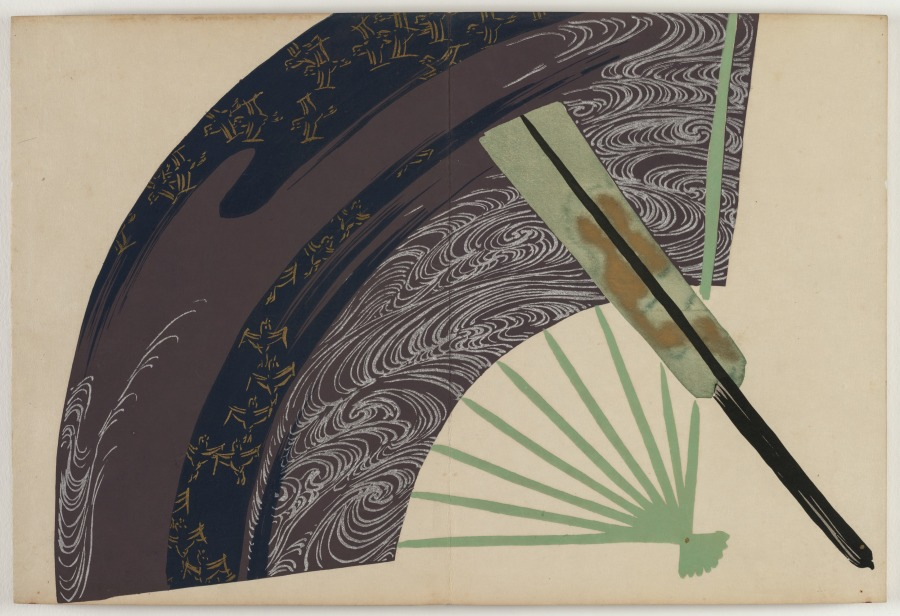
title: Flowers of a Hundred Worlds (Momoyogusa): Folding Fans (Suehiro)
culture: Japan, Meiji period (1868–1912)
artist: Kamisaka Sekka (Japanese, 1866–1942)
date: 1909–10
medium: color woodcuts with gold and silver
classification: Bound Volume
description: This print from a set of three woodblock printed albums displays the graphic design prowess of Kamisaka Sekka. The images were first distributed one by one to subscribers to the series but later were reissued in bound form, like this book, for mass consumers. Each print features a vignette taken from nature or Japanese literature. Many of the scenes have a long history in Japan, originating in the 900s or 1000s and having been interpreted by all manner of artists since that time. Sekka’s selections hew closely to precedents from the Rinpa style originated by painter Tawaraya Sōtatsu (c. 1570–c. 1640) and calligrapher Hon’ami Kōetsu (1558–1637).